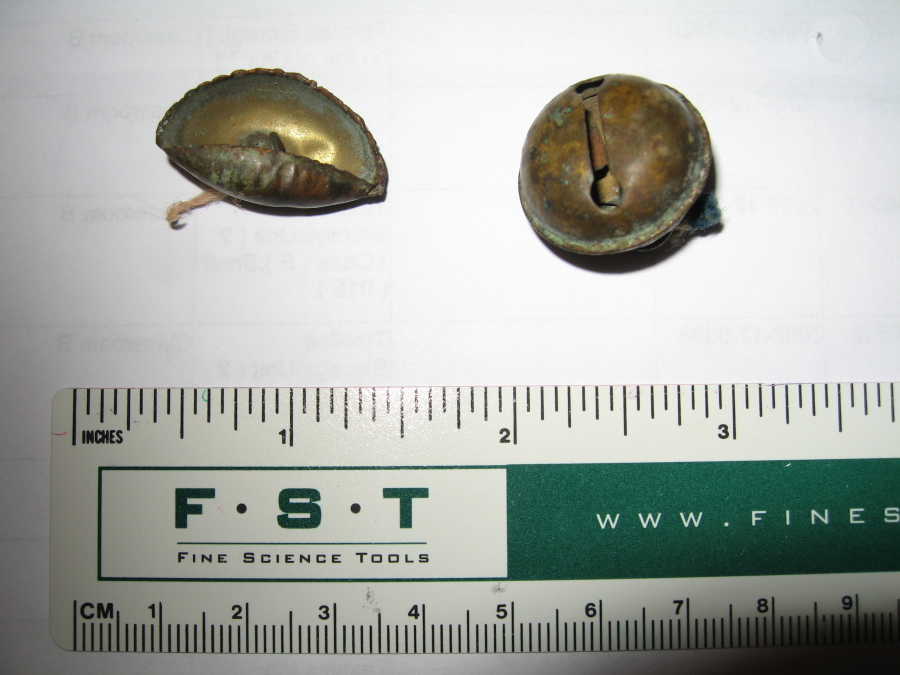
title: Egúngún Masquerade Dance Costume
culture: Africa, West Africa, Nigeria, Yorùbá-style maker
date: 1900s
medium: cotton, velvet, flannel, leather, dye, probably wood, cowrie shells, metal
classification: Mask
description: Swirling into motion, egúngún masquerade costumes appear during annual festivities to bless the community. Manifesting ancestral spirits, they serve as a bridge between the living and the otherworld. The fabric panels create a dwelling place for ancestral spirits. Arranged and selected according to Yorùbá design sense (ojú-ọnà), this mask incorporates hundreds of African, Asian, and European fabrics. These include imported damasks, velvets, faux furs, and embroideries, as well as local indigo-dyed cottons.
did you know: This masquerade costume is made from both imported and locally made fabrics.